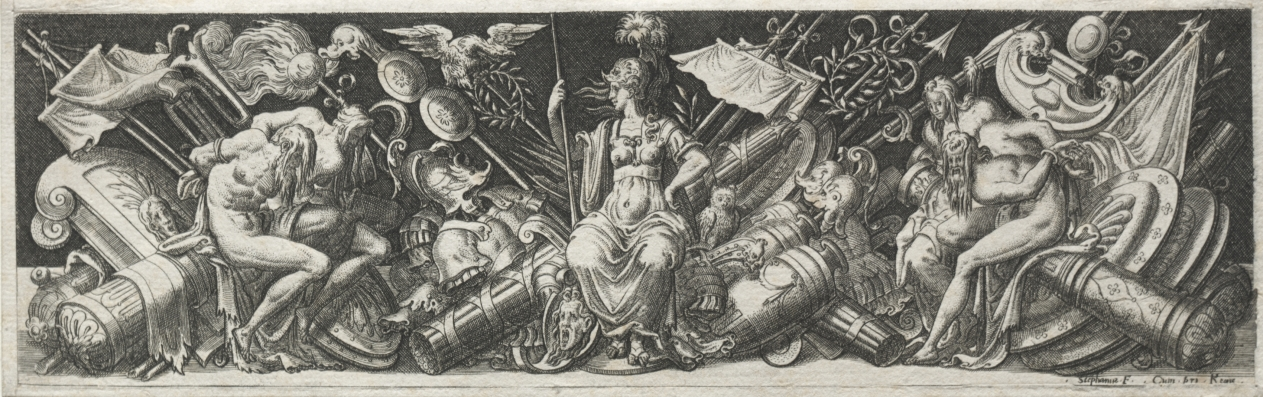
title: Combats and Triumphs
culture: France, 16th century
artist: Etienne Delaune (French, 1518/19-c. 1583)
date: probably 1560s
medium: engraving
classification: Print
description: Etienne Delaune (French, 1518/19-1583) Combats and Triumphs, probably 1560s Engravings Gift of Leonard C. Hanna 1924.671-.674 The Triumph of Bacchus Battle of Men and Animals Combat of the Naked Men Battle of the Centaurs and the Lapiths The four prints shown here come from a series of twelve known as the Combats and Triumphs. The friezelike composition reflects the artist's study of marble relief carvings on Greek and Roman sarcophagi (coffins), here reduced to a preciously small setting. Against a flat, stagelike background, Delaune's balletic warriors engage in a Mannerist version of artificial war. Etienne Delaune was inspired by the art created at Fontainebleau, but he worked in Paris and then Strasbourg during the late 1500s. His small, exquisitely executed engravings reflect his training as a goldsmith and his work as a medallist.